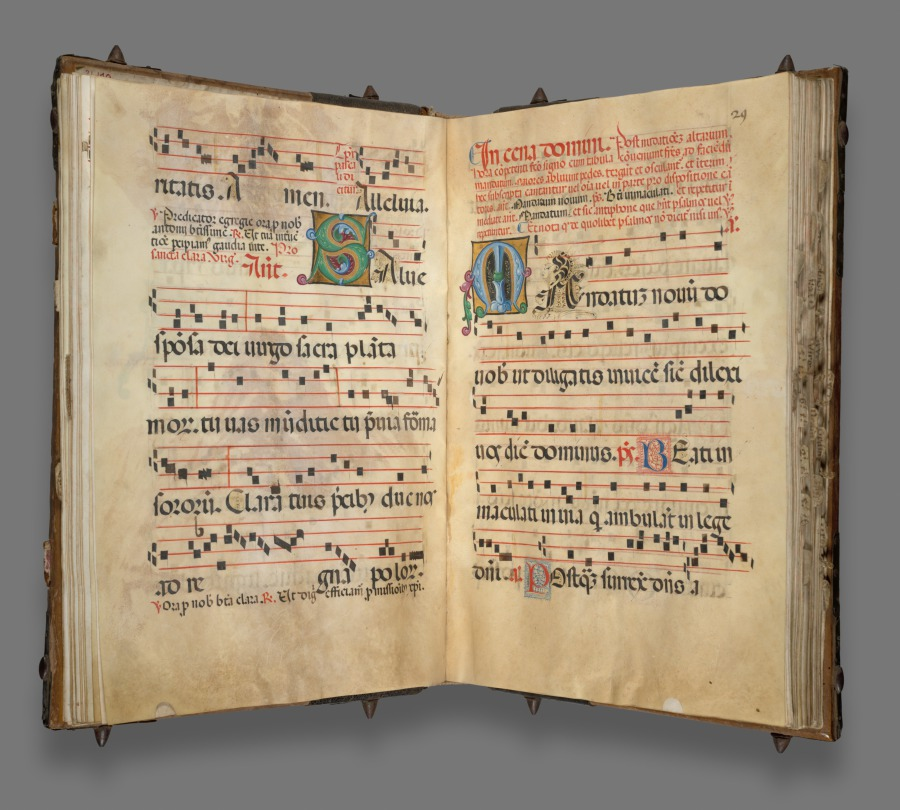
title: Gradual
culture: Italy, Verona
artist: circle of Girolamo dai Libri (Italian, 1474–1555)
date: c. 1520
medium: Ink, tempera, and gold on vellum; wood binding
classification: Manuscript